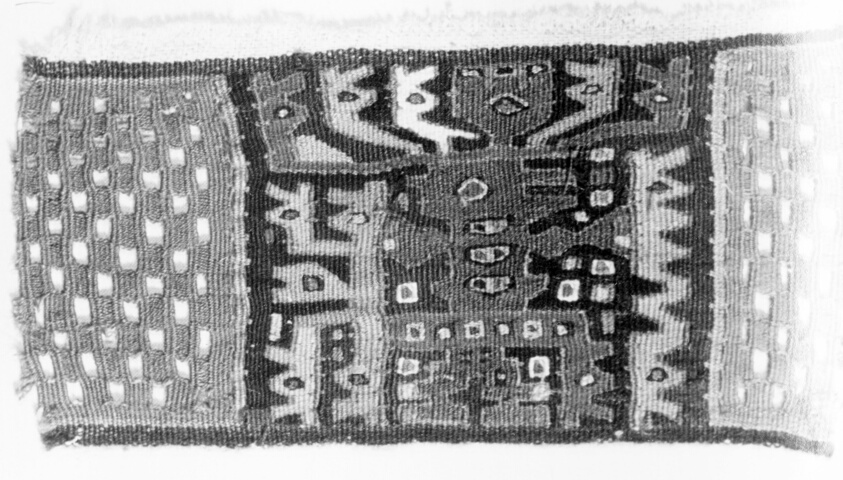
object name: Textile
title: Fragment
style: moche, andean, andes, Pre-Columbian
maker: Moche-Wari; Possibly Huarmey Valley, north-central coast, Peru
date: A.D. 500/1476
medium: slit tapestry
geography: Peru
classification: textile; weaving